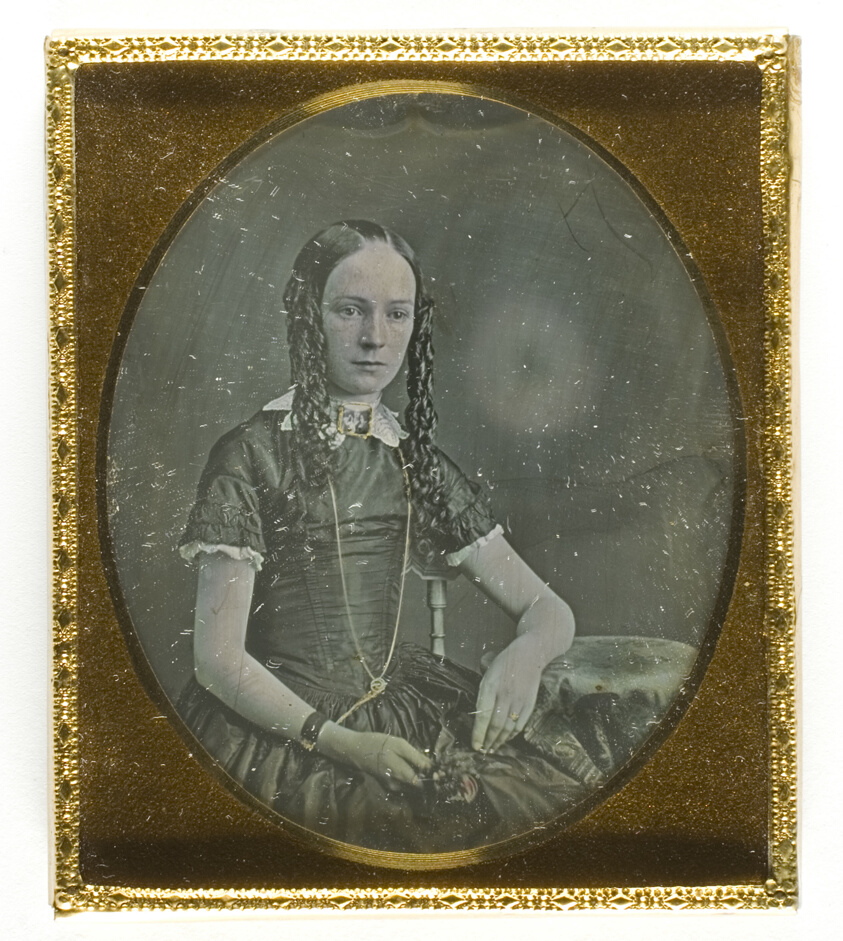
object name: Photograph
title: Untitled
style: 19th century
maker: Artist unknown; 19th century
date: 1839/60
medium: Daguerreotype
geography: Unknown Place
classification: daguerreotype; photographic process; photography; photograph